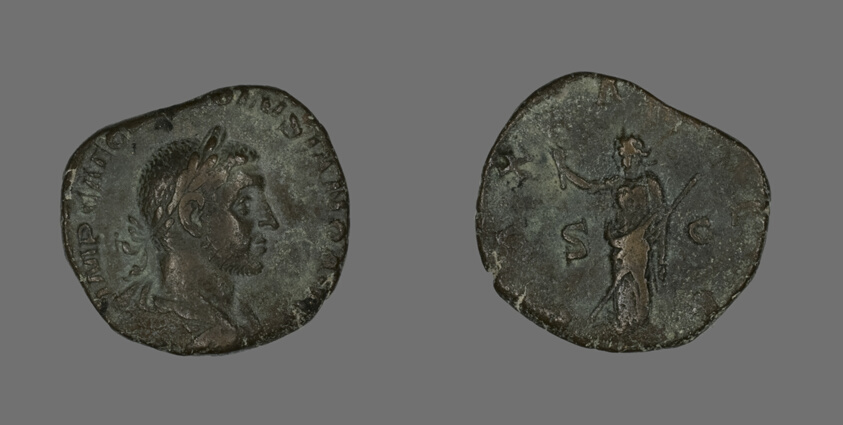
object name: Coin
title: Sestertius (Coin) Portraying Emperor Volusian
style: roman (ancient, style or period)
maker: Roman, minted in Rome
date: 251-253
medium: Bronze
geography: Roman Empire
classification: coin; ancient art